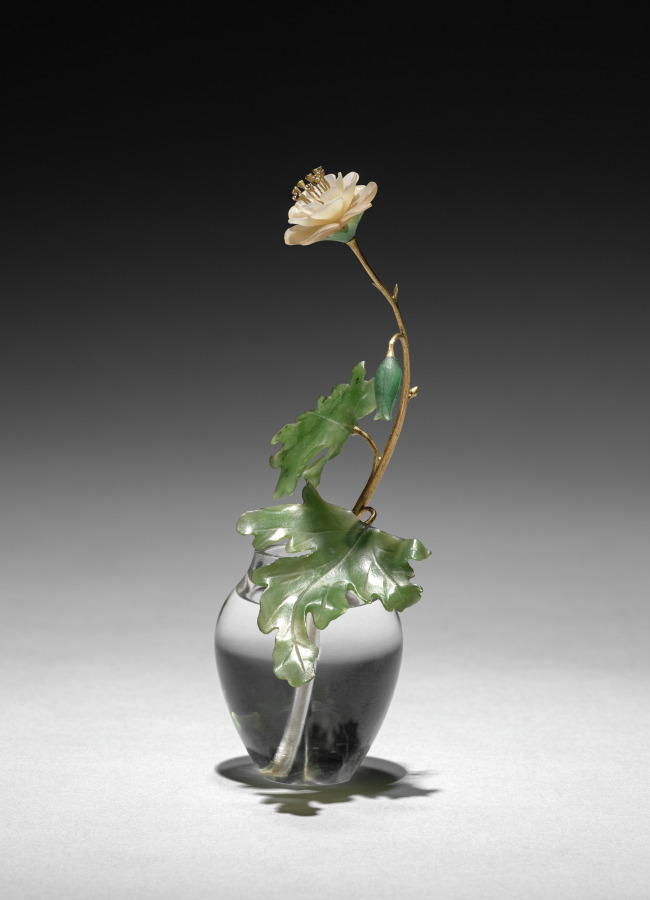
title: Flower Study of an Anemone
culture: Russia, St. Petersburg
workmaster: Henrik Wigström (Russian, 1862–1923)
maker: House of Fabergé (Russian, 1842–1918)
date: c. 1905–15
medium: mat white stone, gold, sapphires, jade, rock crystal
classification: Miscellaneous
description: This flower study depicts a wild anemone in bloom. Fabergé’s inspiration for his flower studies is said to have come from the floral brooches of precious stones that were made in the 1700s for Catherine the Great as well as from the Japanese art of flower arranging, known as ikebana. Small and delicate, Fabergé’s flower studies were given as intimate gifts to friends by the tsarina and others in the court. She also liked to take them around to wherever the imperial family was residing as a reminder of spring during the harsh Russian winters.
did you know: The stems of Fabergé’s flower studies are set into little basins carved from rock crystal to resemble pots of water.